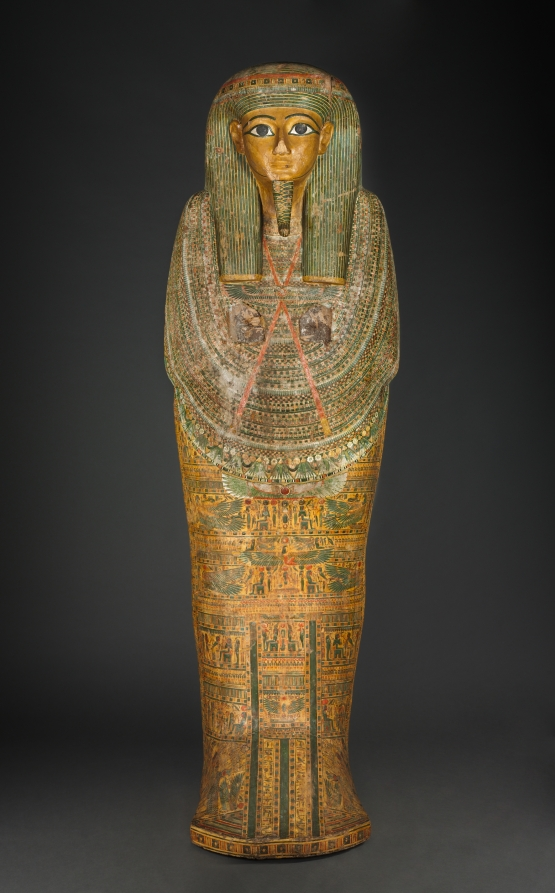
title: Coffin of Bakenmut (lid)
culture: Egypt, Thebes, Third Intermediate (1069–715 BCE), Dynasties 21–22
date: c. 1000–900 BCE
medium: gessoed and painted sycamore fig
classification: Funerary Equipment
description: The coffin of Bakenmut is one of the finest examples of painted wooden coffins made for the priests of Amen and their families at Thebes during Dynasty 21 and early Dynasty 22. The pharaohs of this time were no longer buried in the Valley of the Kings, but instead built tombs in the Delta, far to the north, where they resided. Security was lax in the Theban necropolis. The coffins and funerary goods of the wealthy citizens of Thebes were placed in unmarked and undecorated family tombs cut into the cliffs on the west bank of the Nile. All the care and detail that in more prosperous times were devoted to the decoration of the tomb chapel were now lavished on the elaborately painted coffins. Every available surface is crowded with religious scenes, images of funerary gods and goddesses, protective spells, and magical symbols. The deceased appears mummiform. An elaborate floral collar entirely covers the upper body, exposing only the separately attached hands (now lost). A pair of red "mummy braces" are crossed over the chest, their point of intersection marked by a winged sun disk. The lower body is covered with tiny figures modeled in gesso against a yellow background, which gives the effect of gold inlaid with glass or semiprecious stone. The decoration on the interior features two deified dead kings of Dynasty 18. Although these rulers had lived centuries before, memory of their greatness was still very much alive. The main scene near the top depicts Tuthmosis III, the great military pharaoh, who lived 500 years before Bakenmut. Posed as a mummy, the ruler wears a brilliant feathered garment enfolding him with falcon’s wings. The scene below features back-to-back seated images of Amenhotep I, regarded as the patron of the Theban cemetery and worshiped as a local god there.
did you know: Originally another smaller coffin was placed inside this outer coffin and in that the deceased with a mummy board would have rested.